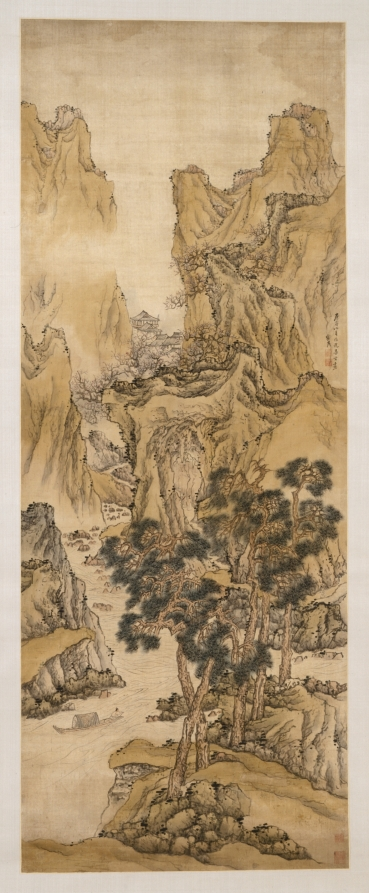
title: The Peach Blossom Spring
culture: China, Ming dynasty (1368–1644)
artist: Liu Du (Chinese, active c. 1628-after 1653)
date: 1650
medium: hanging scroll; ink and light color on satin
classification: Painting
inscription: Artist's inscription, signature, and 2 seals at middle right edge: In the tenth month of the gengyin year [1650], painted in imitation of Zhao Chengzhi [Chao Mengfu]. Liu Du [seals] Liu Du zhi yin; Shu xian.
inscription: 2 additional seals of Low Chuck Tiew 劉作籌 (1911–1993).